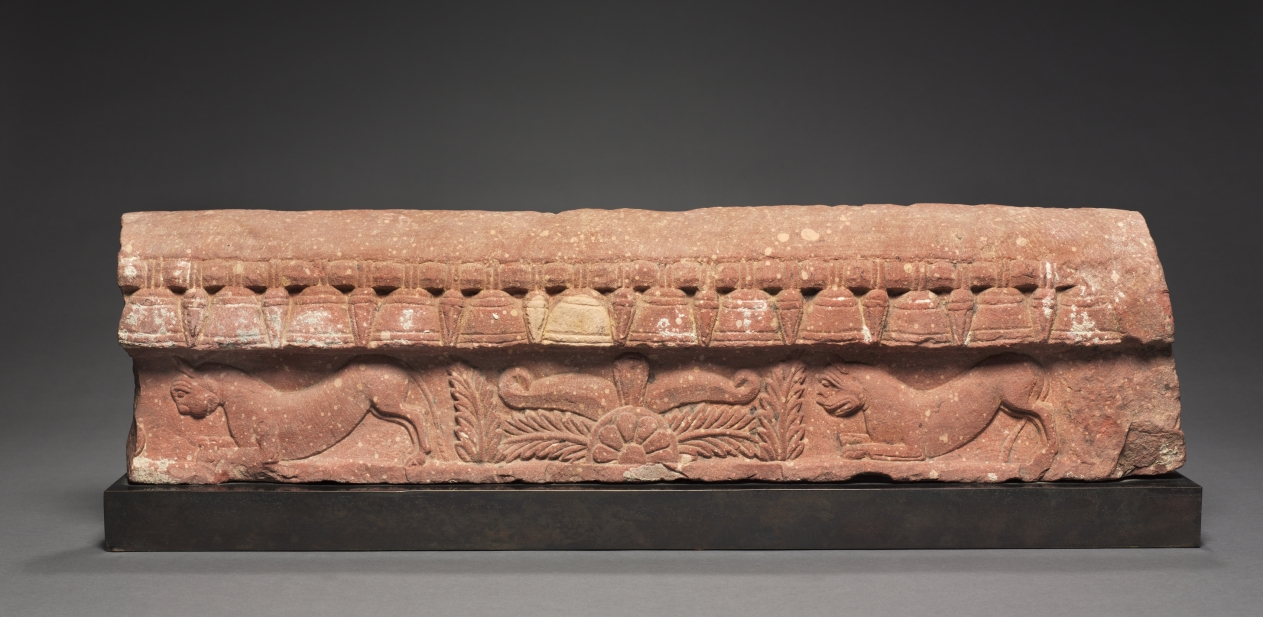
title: Section of a Coping Rail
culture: India, Mathura, Kushan period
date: 1–200 CE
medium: sandstone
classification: Stone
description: The bells are intended to evoke the sounds that once accompanied the sacred space as much as visual ornamentation. A lion and a leonine figure with a human face bound enthusiastically as part of a parade of creatures who circle the monument in the proscribed clockwise direction. The exaggerated linear outlining of their features and the flatness of their bodies are stylistic features of relief sculpture from this period. The motif in the center has vegetal fronds symmetrically springing from a lotus rosette in the form of an auspicious symbol called shrivatsa, which is also found on the chests of Jinas-liberated beings of the Jain tradition-and the Hindu god Vishnu.